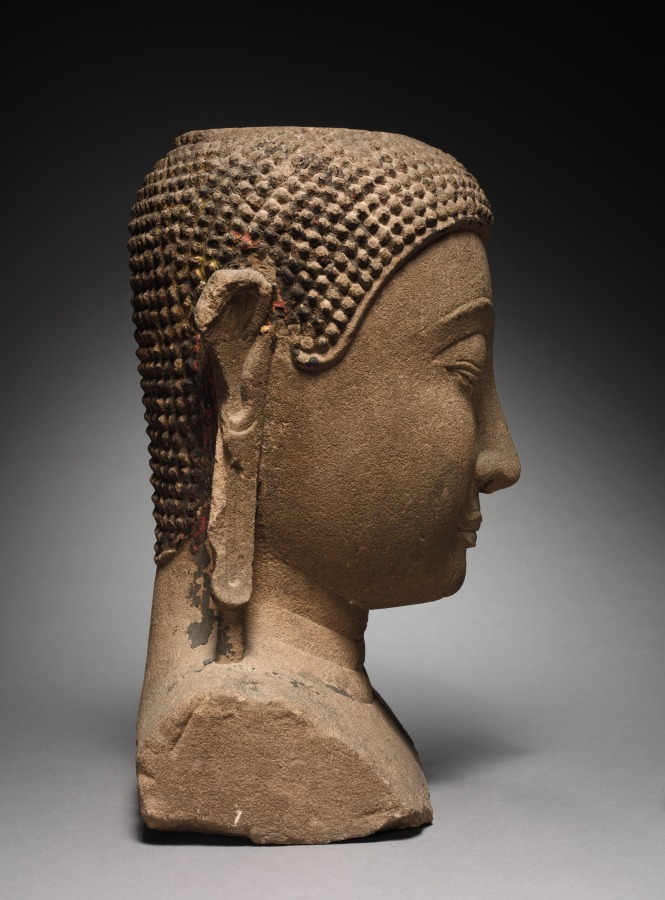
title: Head of Buddha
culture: Thailand, Ayutthaya, 14th-15th century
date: 1350–1425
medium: sandstone and lacquer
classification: Sculpture